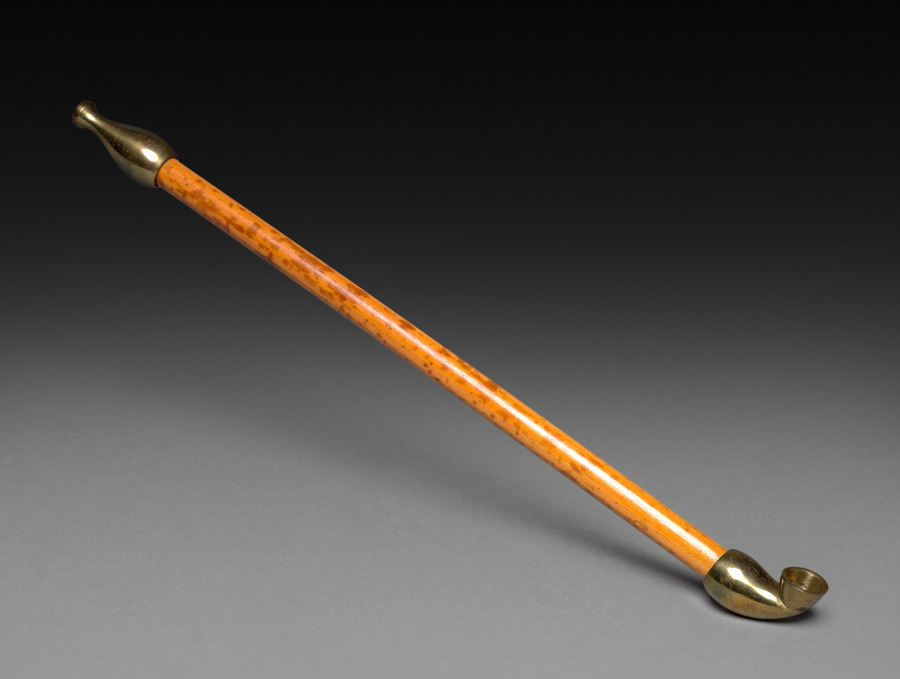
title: Tobacco Pipe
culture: Japan, Edo period (1615–1868) to Meiji period (1868–1912)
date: 1800s–1900s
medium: bamboo and brass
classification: Miscellaneous